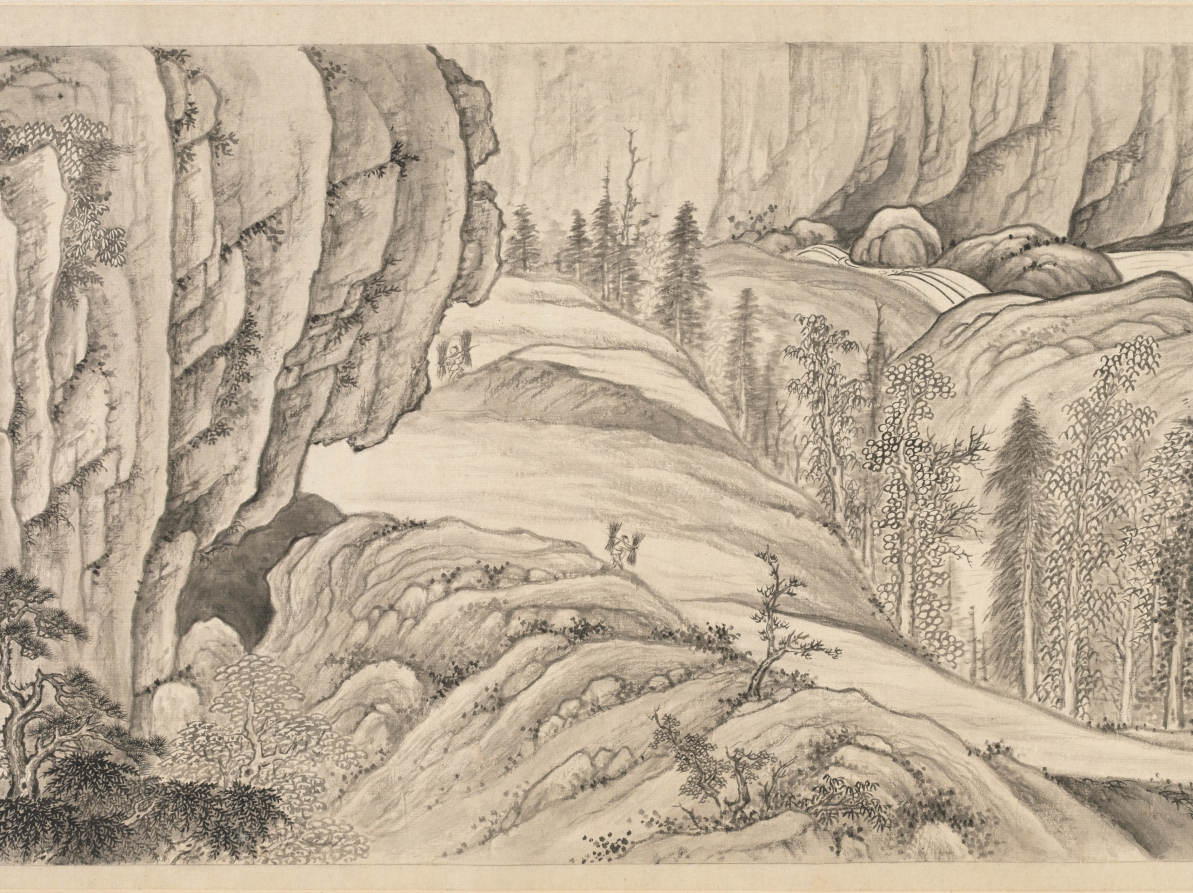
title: Meditative Visit to a Mountain Retreat: In Picture and in Words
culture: China, Ming dynasty (1368–1644)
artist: Xiang Shengmo (Chinese, 1597–1658)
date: 1648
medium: handscroll; ink on paper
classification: Painting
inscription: Artist's title and 3 seals (in front of painting): [title] Meditative Visit to a Mountain Retreat: In Picture and in Words 巖栖思訪圖詠 [3 seals] Tian lai ge zhong wen sun 天籟閣中文孫; Xiang shi kong zhang zui xin han mo 項氏孔彰醉心翰墨; Qing fu yuan zhong di yi miao ye 清福緣中第一妙業.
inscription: [印] 兔烏叟; 考古正今. 觀斯人兮何逍遙，非逍遙兮思其友。 思其友兮天一方，欲一訪之難回首。 松耶柏耶稱後凋，巖穴霏微何二酉。 山兮水兮人悠悠，遠莫致之神交否？ 河關一向望不及，言笑于今更非偶。 問游魚兮樂何深？問飛鳥兮歸何藪？ 問猿鶴兮何親疎？問鹿豕兮何夭壽？ 問白雲兮從何來？問流泉兮向何走？ 問漁樵兮何江山？問草木兮何畝畎？ 問春秋兮何炎涼？問世人兮何長久？ 問日月兮何晦明？曾見當時烏兔叟？ 戊子嘉平之初偶作此圖并題。 胥樵項聖謩識。 [印] 兔烏叟; 項氏孔彰; 未喪斯文.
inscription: 13 additional seals: 4 of Tang Zuomei 唐作梅 (late 18th–19th century); 3 of Zhang Baixi 張百熙 (1847–1907); 4 of Zhang Heng 張珩 (1915–1963); 2 unidentified.